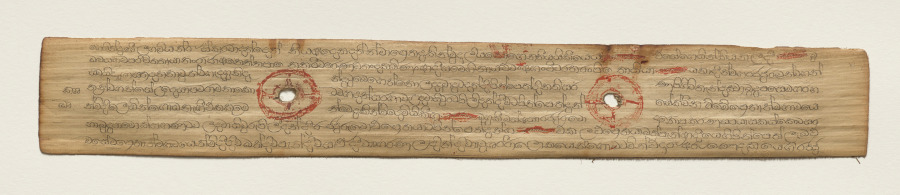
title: Leaf from a Buddhist Manuscript (recto)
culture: Sri Lanka, Singhalese, Late 17th century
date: c. 1700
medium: fiber paper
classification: Manuscript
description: Palm leaf material is still used for manuscripts in Sri Lanka. The palm leaves are prepared first by boiling them, drying them in the sun, and then rubbing them with oils. Scribes then use a metal stylus to incise the text. Then charcoal powder is wiped across the pages, filling in only the inscribed lines.